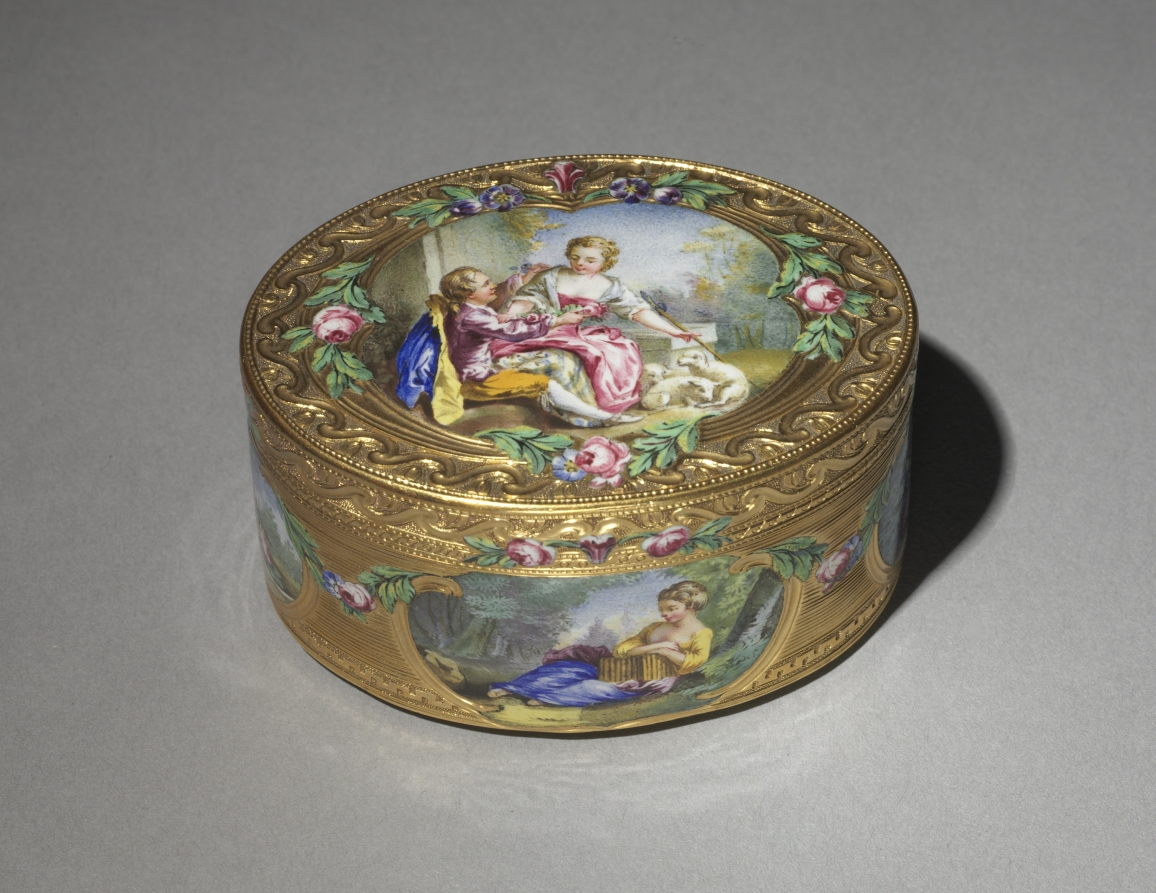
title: Snuff Box (Tabatière)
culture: France, 18th century (style of Louis XV)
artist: Francois Guillaume Tiron (French)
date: 1761–62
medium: gold and enamel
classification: Miscellaneous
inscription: [Maker's mark of Francois-Guillaume Tiron, master goldsmith in 1747, inside cover]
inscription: [Warden's mark, Paris, 1761-1762, inside cover]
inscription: [Charge mark of Eloi Brichard and Etienne Somfoye, Paris, 1756-1762, inside cover]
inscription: [Maker's mark of Francois-Guillaume Tiron, inside bottom]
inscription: [Warden's mark, 1761-1762, inside bottom]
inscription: [Charge mark of Brichard and Somfoye, inside bottom]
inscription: [Maker's mark of FG Tiron, left wall]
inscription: [Charge mark of Brichard and Somfoye, left wall]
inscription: [Warden's mark, Paris, 1761-1762, left wall]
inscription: [Discharge mark of J.J. Prevost, Paris, 1762-1768, bezel at right]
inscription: [Engraved number, maybe retailer's number]: "n. 13676"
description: The pastoral scenes that decorate this box are typical of the style of François Boucher, a celebrated painter of the period whose works were popularly reproduced on decorative arts. Snuff boxes, used practically as containers for powdered tobacco, were often decorated with miniature reproductions of notable works. The miniature on the cover is inspired by Boucher’s The Galant Pastor (Le Pasteur Gallant) (1738) and that on the bottom by The Amusement of the Shepherd Girl (L’Amusement de la Bergère) (1700s).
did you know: François Boucher was a favorite of the French royal court of Louis XV and named first painter of the king in 1765.